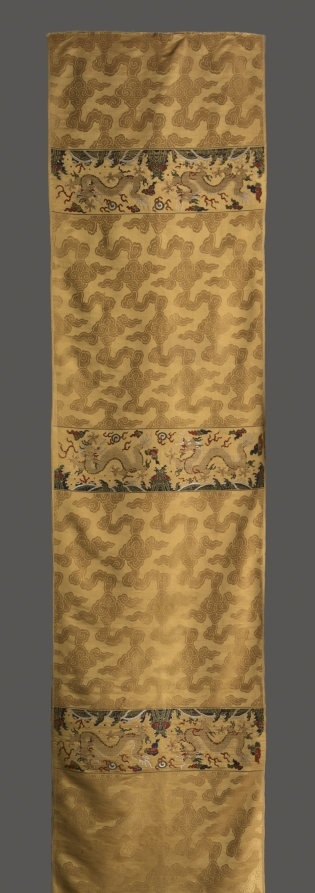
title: Silk Panel with Dragon and Cloud Motif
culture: China, Qing dynasty (1644-1911), Jiangnan Imperial Factory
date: c. 1700s-1800s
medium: Silk and metal thread: Jacquard weave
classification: Textile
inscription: The inscription woven into its selvage reads: Jiangnan Silk Factory under Superintendent Wen Feng(?)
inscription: Signature: Artisan [Weaver] Chen Jirong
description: This panel of silk produced in one of the imperial factories is the end part of a bolt of silk, some of which were shipped to Beijing as tax payments. The inscription woven into the lower body of the fabric reads Jiangnan Silk Factory under Superintendent Wen Feng(?). An additional signature by the weaver is woven into the left corner. Since the Southern Song dynasty in the 1100s, the production of silk for imperial use was increasingly concentrated in the Lower Yangzi Delta, also called Jiangnan. By the Ming and Qing dynasties the main official imperial workshops were situated in the region’s cities of Hangzhou, Suzhou, and Nanjing.